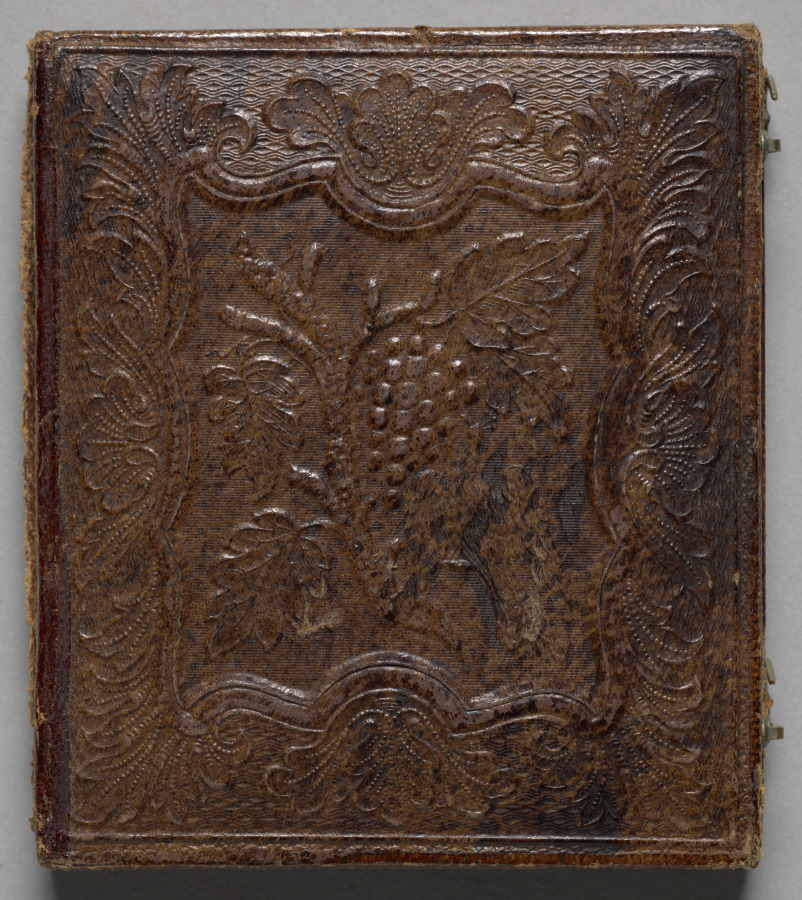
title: Black Woman and White Child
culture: America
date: c. 1855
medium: daguerreotype, sixth plate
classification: Photograph